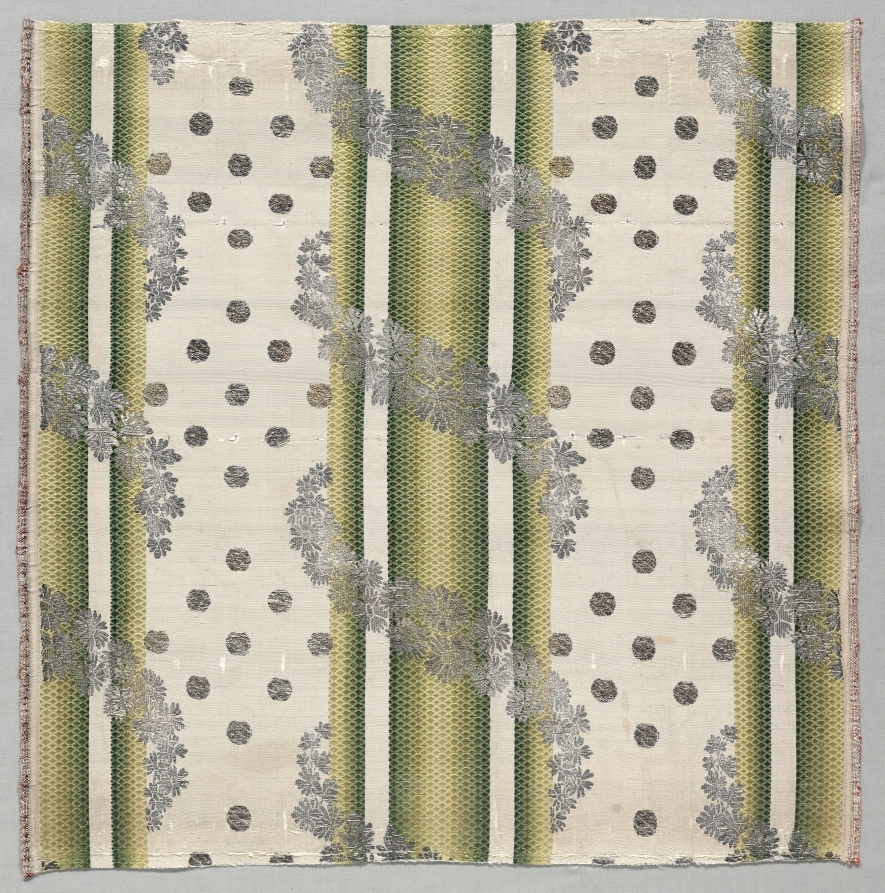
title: Length of Taffeta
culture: France, Louis XVI (1774-1793) period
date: 1774–93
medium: Silk: taffeta, warp-patterned and brocaded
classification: Textile